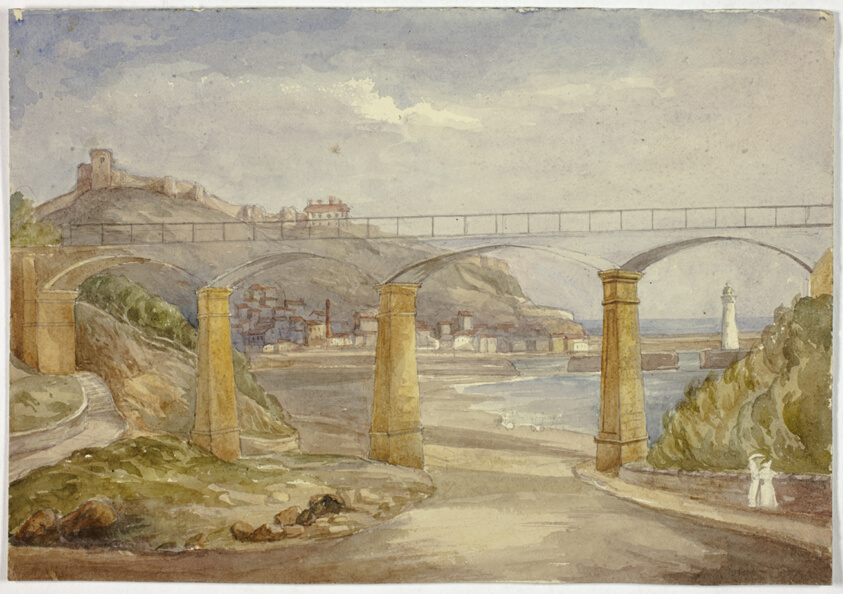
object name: Drawing and Watercolor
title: Scarborough (recto), and Sketch of House with Mother and Children (verso)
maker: Elizabeth Murray (English, c. 1815-1882)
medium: Watercolor over graphite (recto), and graphite (verso), on ivory wove paper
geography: England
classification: watercolor; drawings (visual works); prints and drawing